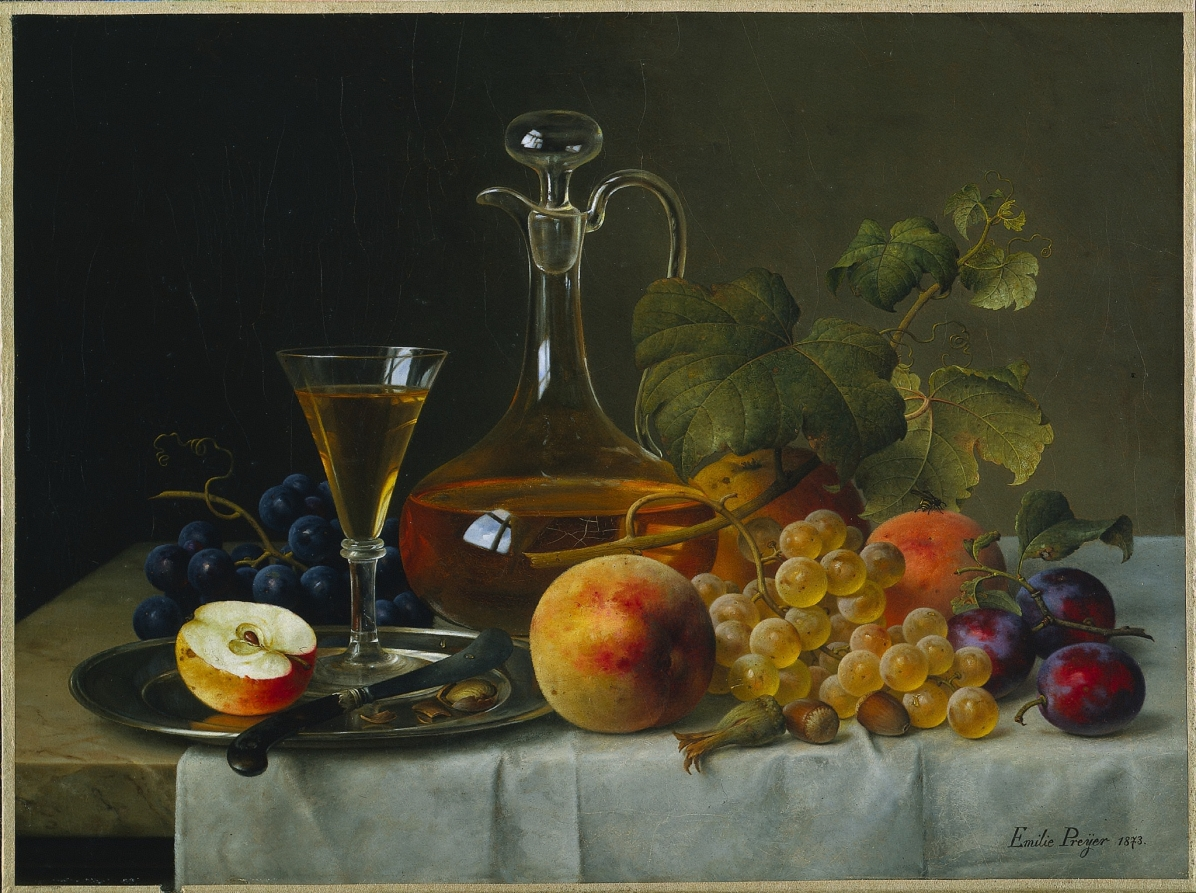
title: Still Life with Fruit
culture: Germany, 19th century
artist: Emilie Preyer (German, 1849–1930)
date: 1873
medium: oil on fabric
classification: Painting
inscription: Signed lower right corner: Emilie Preijer 1873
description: This composition contains many elements that show Preyer's technical abilities. She convincingly rendered the various textures juxtaposed in this composition, such as the contrast between the white cloth and the polished marble table, and the reflecting surfaces of metal, water drops, and glass versus the delicate skin of peaches and grapes. The knife that appears to project out over the side of the table is an indicator of Preyer's familiarity with the tradition of Dutch still-life painting. After early training with her father, Johann Wilhelm Preyer (1803-1889), Emilie Preyer painted her first still life in 1867. For study purposes, she visited museums in Dresden, Antwerp, and the Netherlands. She focused primarily on still lifes of fruit.